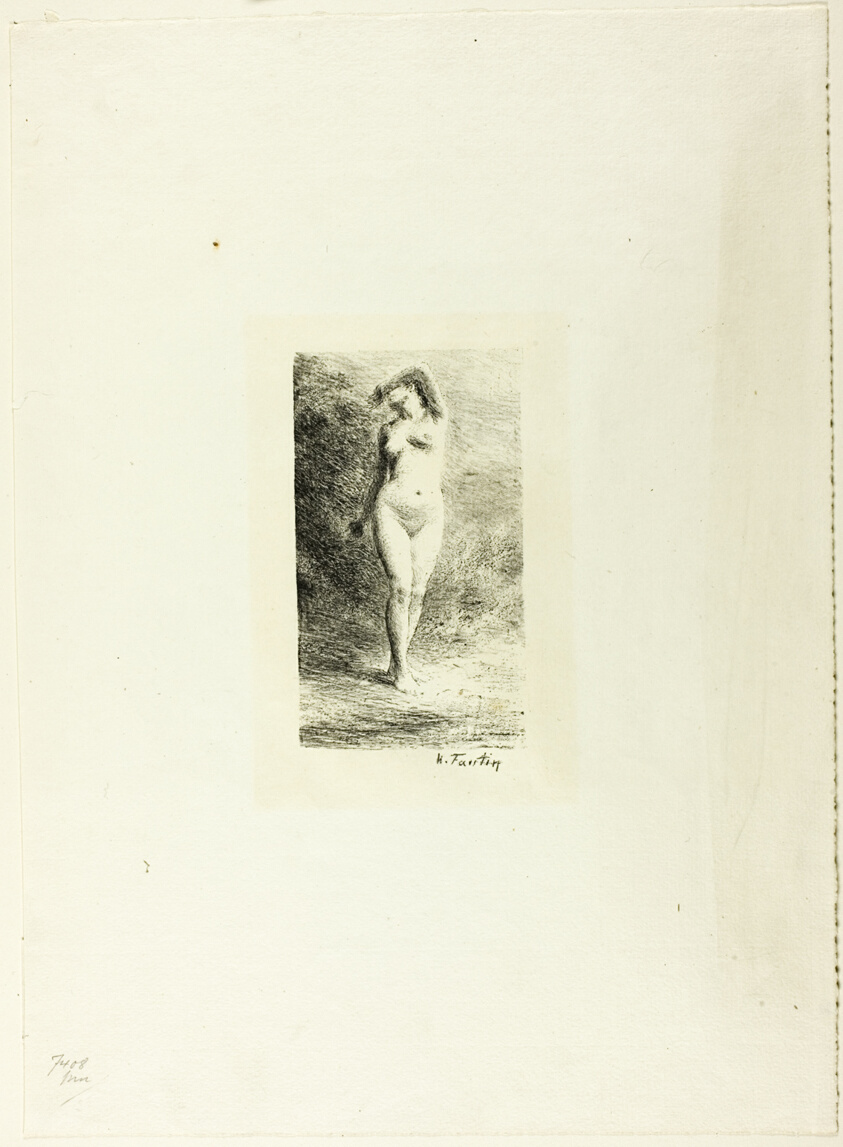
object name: Print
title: Study of Standing Woman, Seen from Front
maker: Henri Fantin-Latour (French, 1836-1904)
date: 1900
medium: Lithograph in black on ivory laid paper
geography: France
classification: lithograph; print; prints and drawing